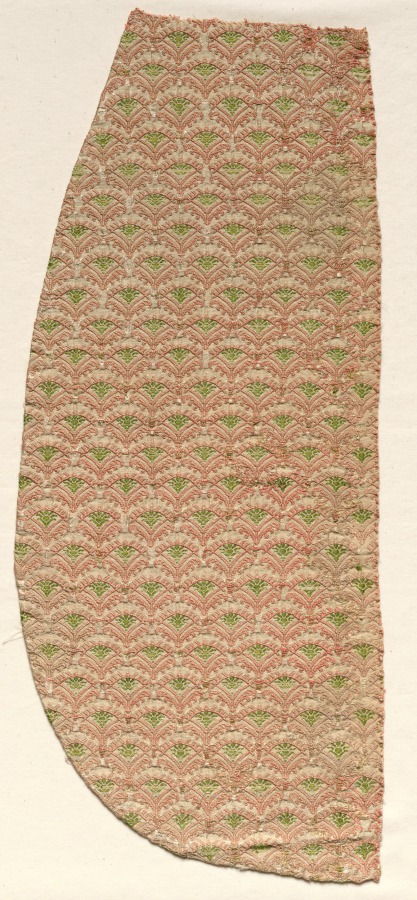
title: Fragment of a Chasuble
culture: Italy, 17th century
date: 1600s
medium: lampas weave (?), silk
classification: Textile